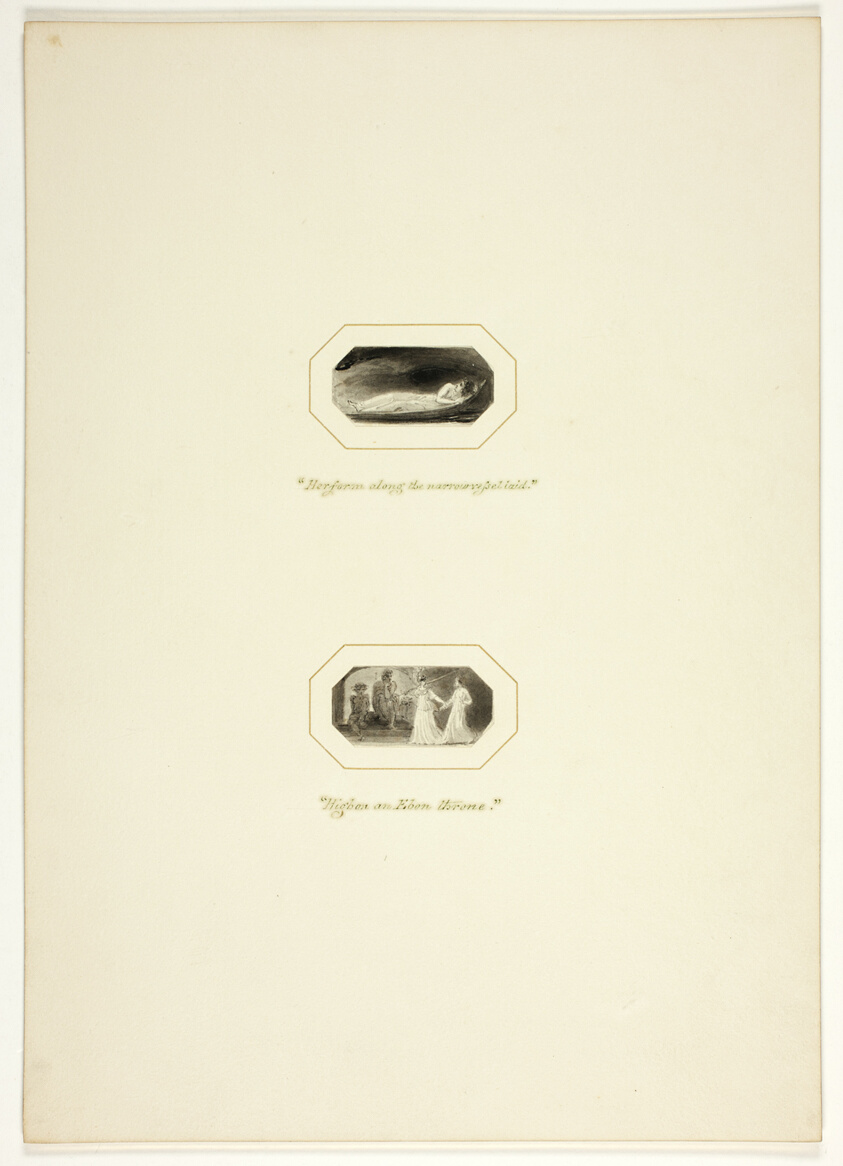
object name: Drawing and Watercolor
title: Study for a plate from The Triumphs of Temper, in the 1796 Royal Engagements Pocket Book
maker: Thomas Stothard (English, 1755-1834)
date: c. 1795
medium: Ink wash on paper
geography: England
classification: ink or chalk wash; drawings (visual works); prints and drawing